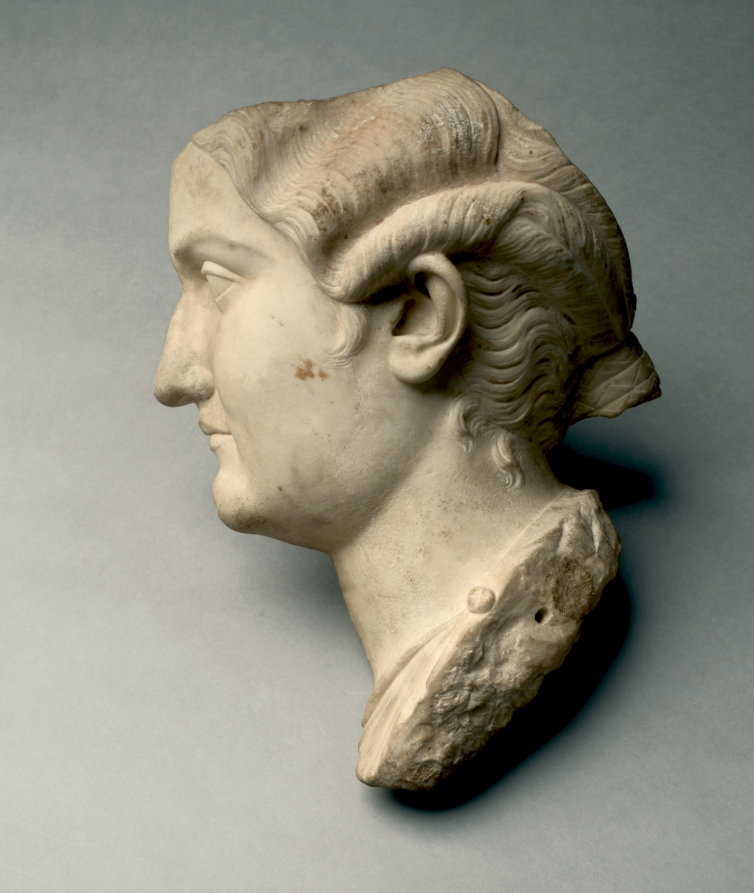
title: Head of a Woman (fragmentary)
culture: Italy, Roman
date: 100s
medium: marble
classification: Sculpture